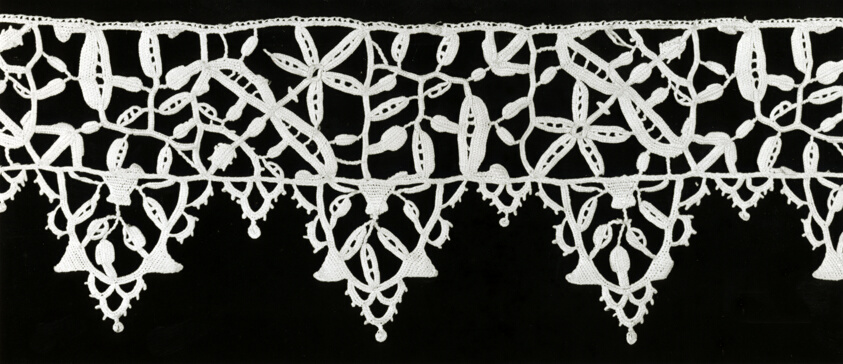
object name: Textile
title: Border (From a Cover)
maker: Italy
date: 1601/25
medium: Linen, needle lace worked on a laid and plaited thread grid with detached points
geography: Italy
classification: textile; lace - needle